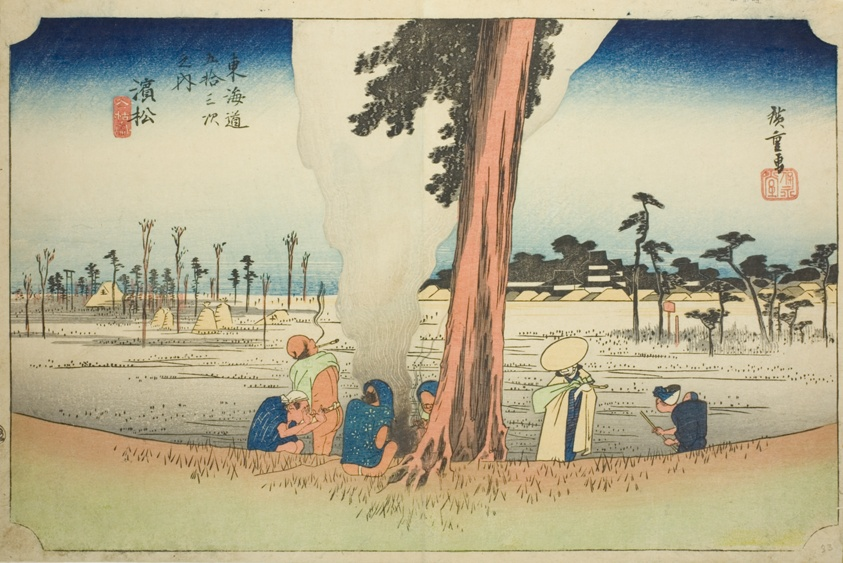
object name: Print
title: Hamamatsu: Winter Scene (Hamamatsu, fuyugare no zu), from the series "Fifty-three Stations of the Tokaido (Tokaido gojusan tsugi no uchi)," also known as the Hoeido Tokaido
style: Japanese (culture or style)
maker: Utagawa Hiroshige 歌川 広重; Japanese, 1797-1858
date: c. 1833/34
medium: Color woodblock print; oban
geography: Japan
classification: woodblock print; print; asian art